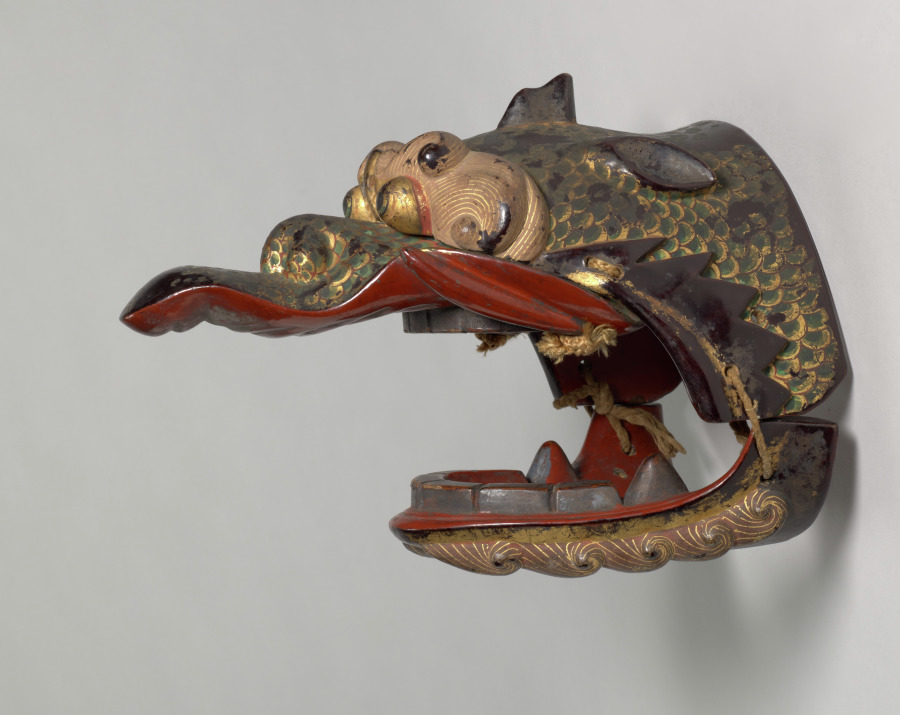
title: Shoulder Piece for a Gigaku Costume in the Form of a Dragon Head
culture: Japan, Kamakura period (1185–1333)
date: 1200s–early 1300s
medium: lacquered wood with color and gold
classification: Sculpture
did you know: This dragon head is made of three pieces of carved lacquered wood with movable jaws fastened with twine.